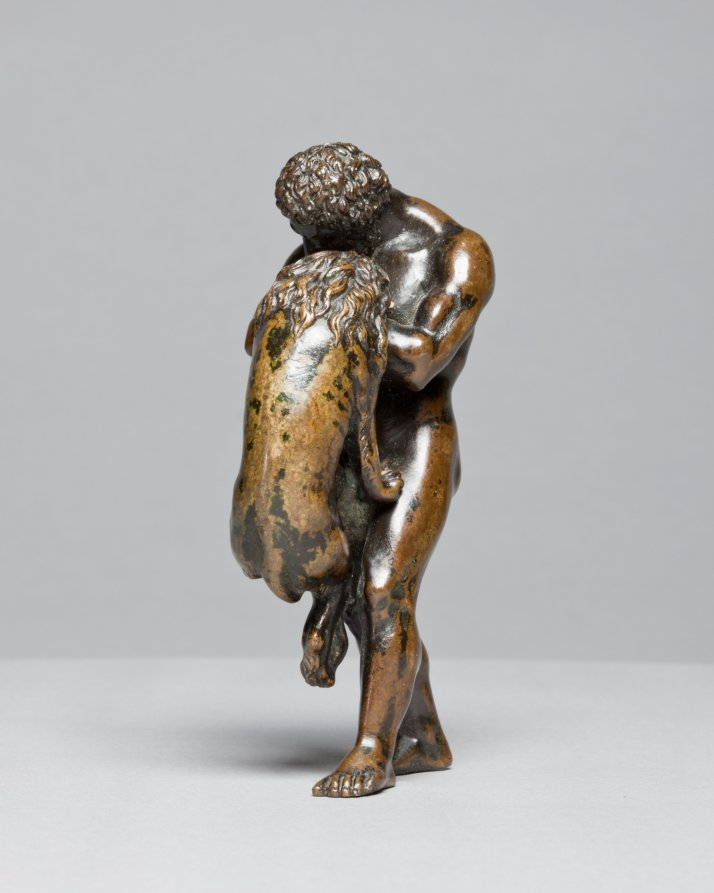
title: Hercules and the Nemean Lion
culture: Italy or France, 16th century or later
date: 1500s or later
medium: bronze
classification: Sculpture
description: The original owner of this work would have understood that this scene referred to the entire story of Hercules, the demi-god who had to accomplish twelve labors. The lion is named after the city of Nemea, near Corinth, a monstrous beast sent by the goddess Hera to wreak havoc on the area. After killing the lion, Hercules wore his pelt, commonly seen in other representations of the hero.